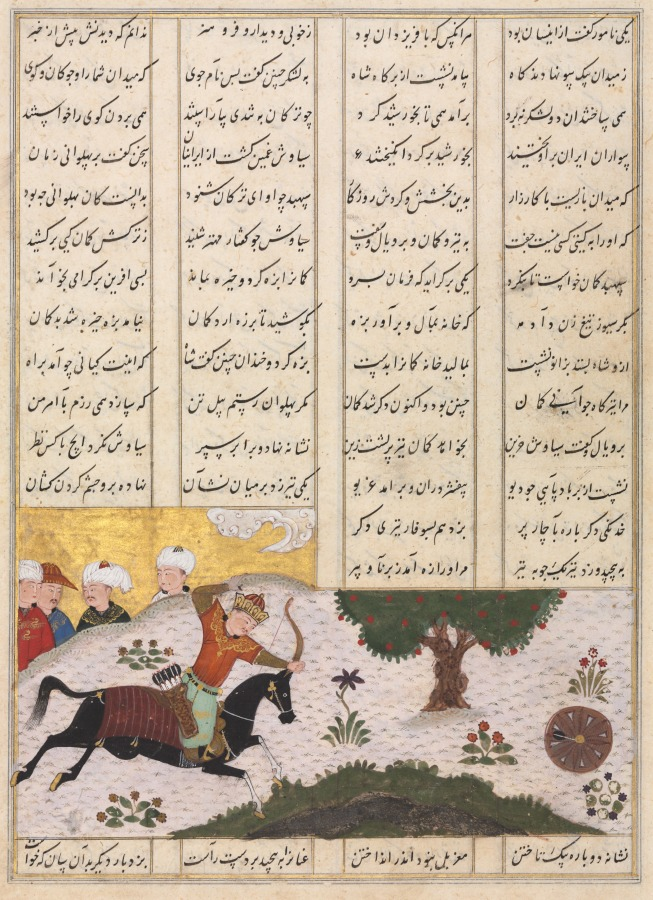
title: Siyavush on His Horse Hitting a Rolling Target (recto) and Persian verses (verso), from a Shahnama (Book of Kings) of Firdausi (940–1019 or 1025)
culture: Iran, Shiraz, Timurid period (1370-1501)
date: late 1400s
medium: Opaque watercolor, silver, gold, and ink on paper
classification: Manuscript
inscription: script: Nasta'liq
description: A prince from Iran’s early legendary history, Siyavush was sent by his father, the shah, to train under the great warrior Rustam in the arts of hunting, archery, and horseback riding. In this painting, Siyavush demonstrates his considerable skill by hitting the bulls eye on a rolling target from horseback. The gold sky, pastel ground with grassy tufts, and dense leafy riverbank are distinctive features of Persian painting during this period.